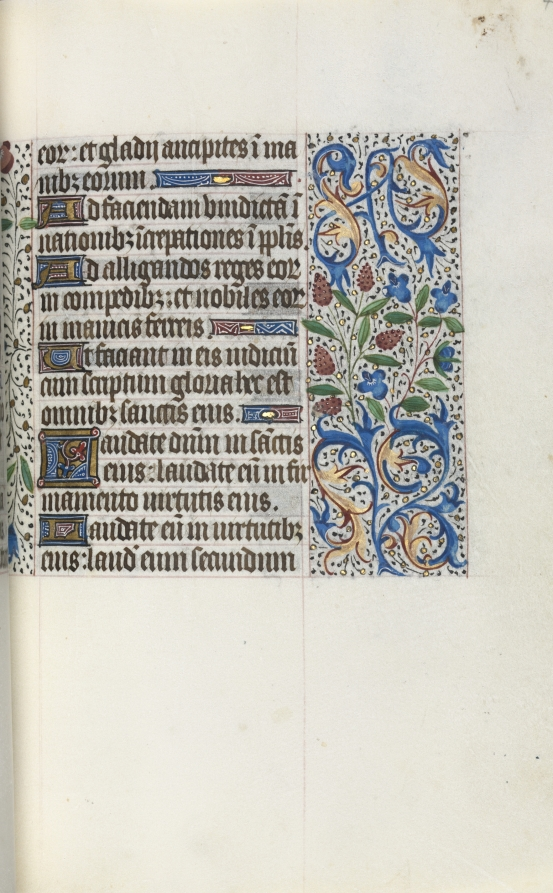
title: Book of Hours (Use of Rouen): fol. 46r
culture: France, Rouen, 15th century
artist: Master of the Geneva Latini (French, active Rouen, 1460–80)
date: c. 1470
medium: ink, tempera, and gold on vellum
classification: Bound Volume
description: In the late 1400s and early 1500s Rouen was an established and important center of book production. The city’s cathedral had a wealthy chapter that spent large sums of money to commission books and to maintain its extensive library. The stationers and booksellers would have likely been concentrated in or near the cathedral precinct. This artist, named after a manuscript now in Geneva, was Rouen’s principal illuminator during the second half of the 1400s.